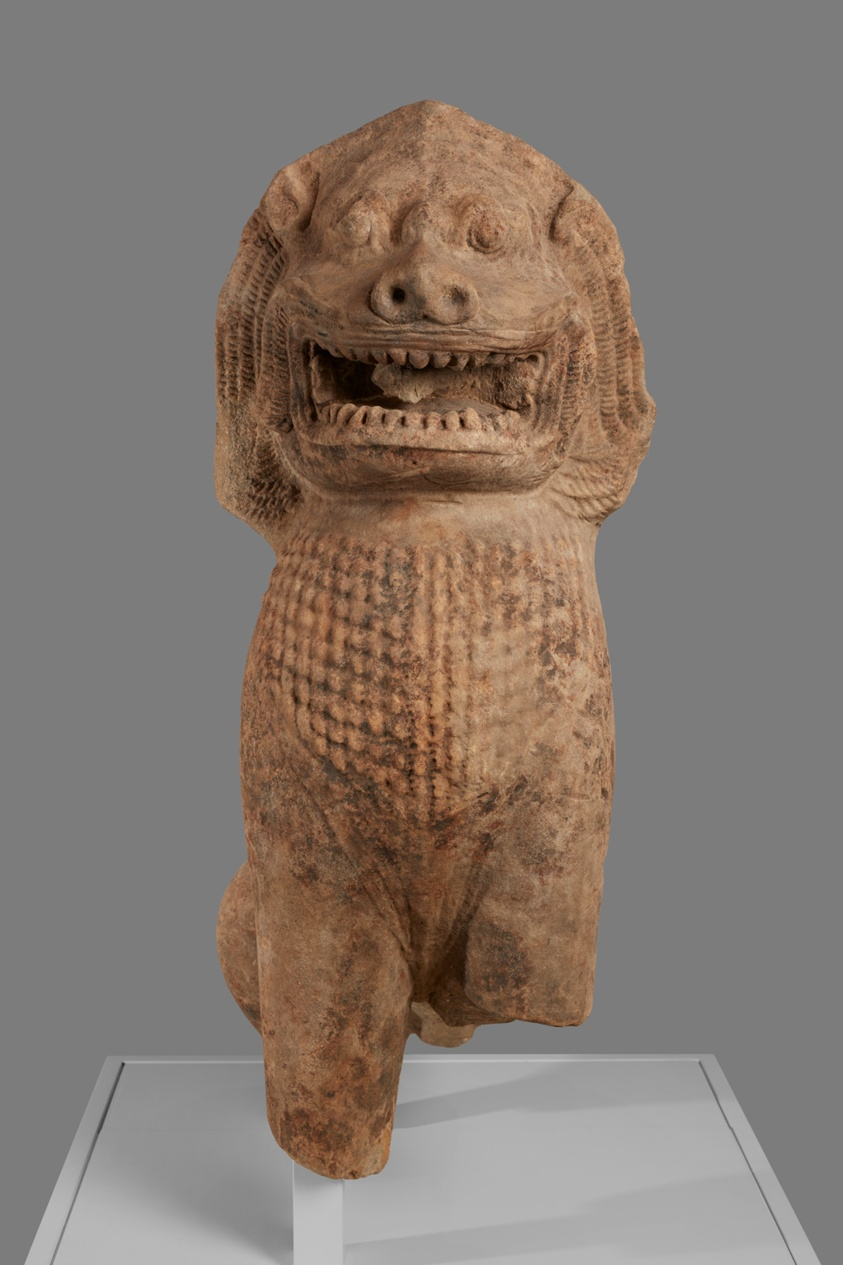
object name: Sculpture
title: Guardian Lion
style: angkorean, cambodian, Southeast Asian, asian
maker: Cambodia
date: Angkor period, 12th century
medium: Sandstone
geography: Cambodia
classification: sandstone; stone; sculpture; asian art